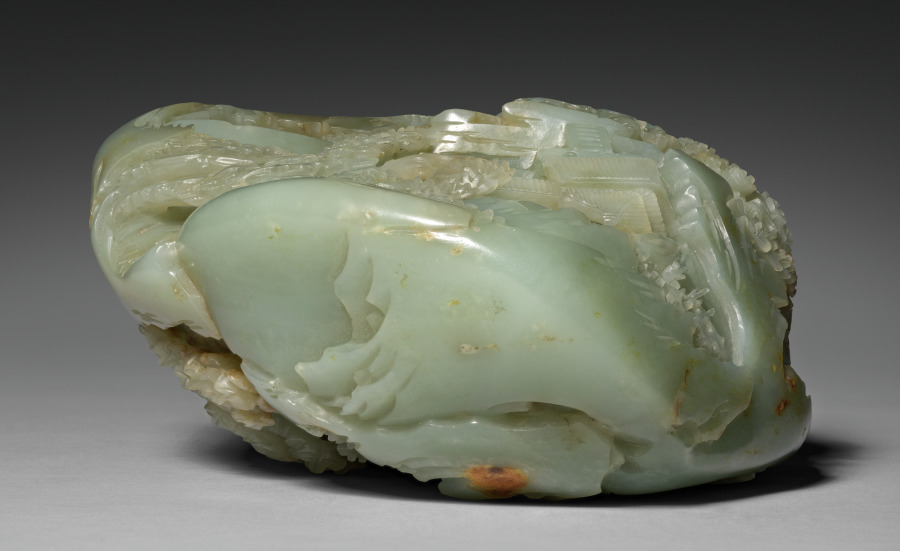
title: Miniature Mountain with Daoist Paradise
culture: China, Qing dynasty (1644–1911), Qianlong reign (1736–95)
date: 1736–95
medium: green jade with brown markings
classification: Jade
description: Sizable jade boulders of mountainous landscapes were carved to represent the search for the paradise or immortals' dwellings in the mountains. This Daoist theme has fired the Chinese imagination throughout history. Believed to have spiritual and magical properties, jade has long been used in tombs and intended for preserving the corporeal body and the soul in the quest for eternity. It is recorded that Daoist practitioners drank morning dews with scraps of jade as an elixir of immortality.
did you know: The bearded immortal is accompanied by a servant carrying a cluster of peaches, symbols of immortality.